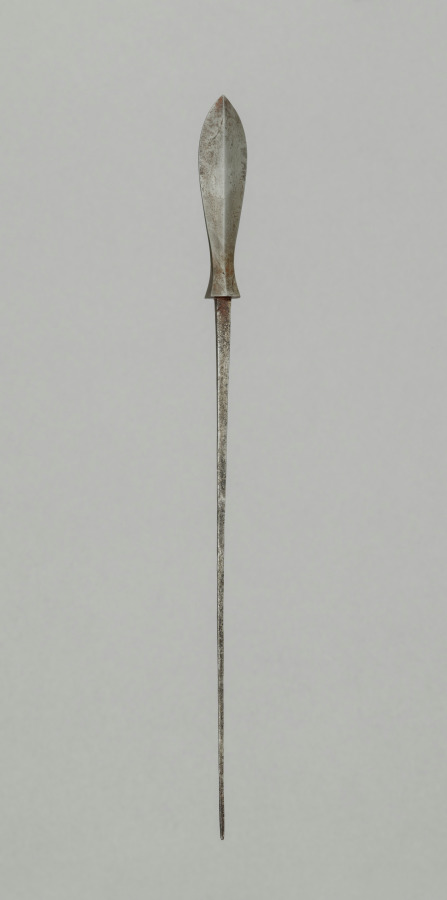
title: Arrow Point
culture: Japan, Edo period (1615–1868)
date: 1700s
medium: steel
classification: Arms and Armor